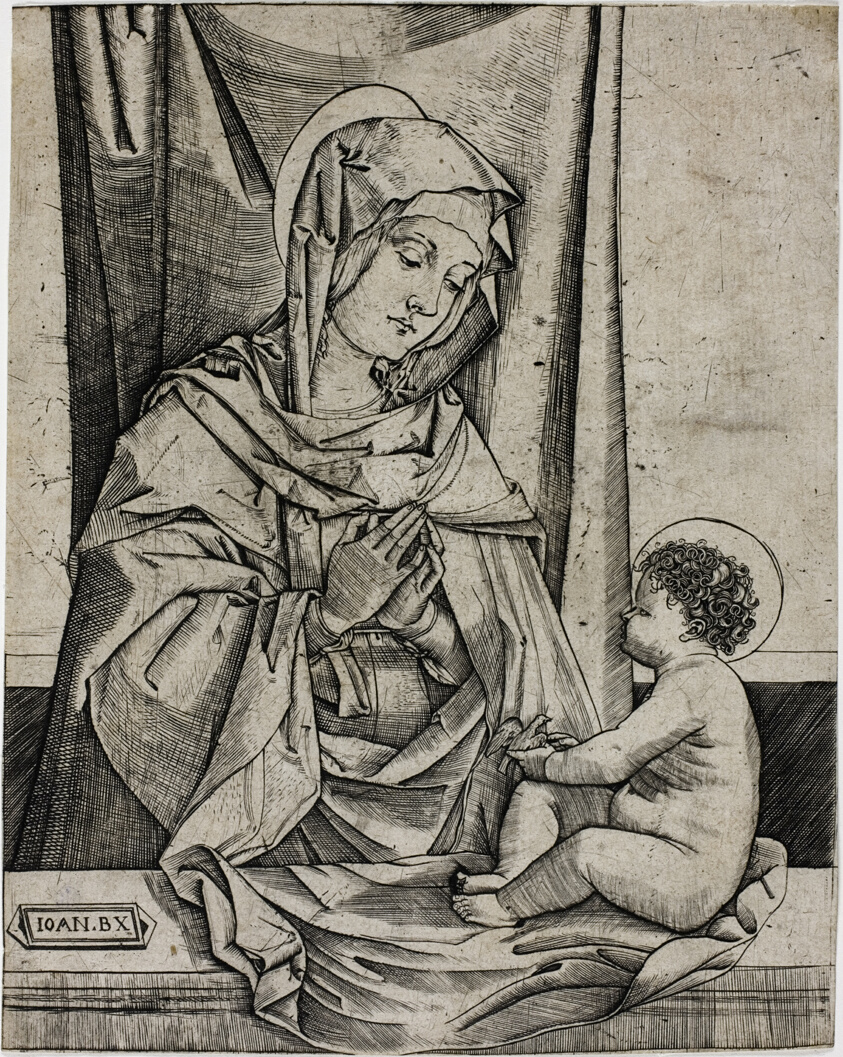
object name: Print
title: The Virgin and Child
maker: Benedetto Montagna (Italian, c. 1480-1556/58)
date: c. 1502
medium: Engraving on paper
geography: Italy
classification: print; prints and drawing